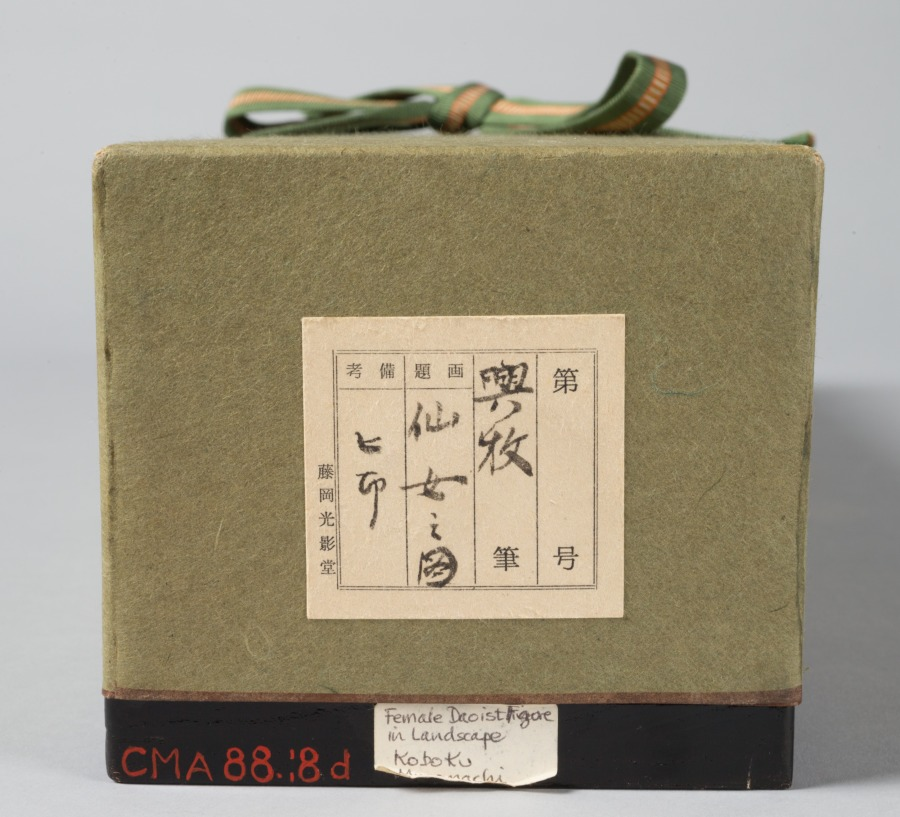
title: Female Daoist Figure in Landscape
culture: Japan, Muromachi period (1392–1573)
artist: Kōboku (Japanese)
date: early 1500s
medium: hanging scroll; ink on paper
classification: Painting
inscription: 「興牧」（朱文方印）